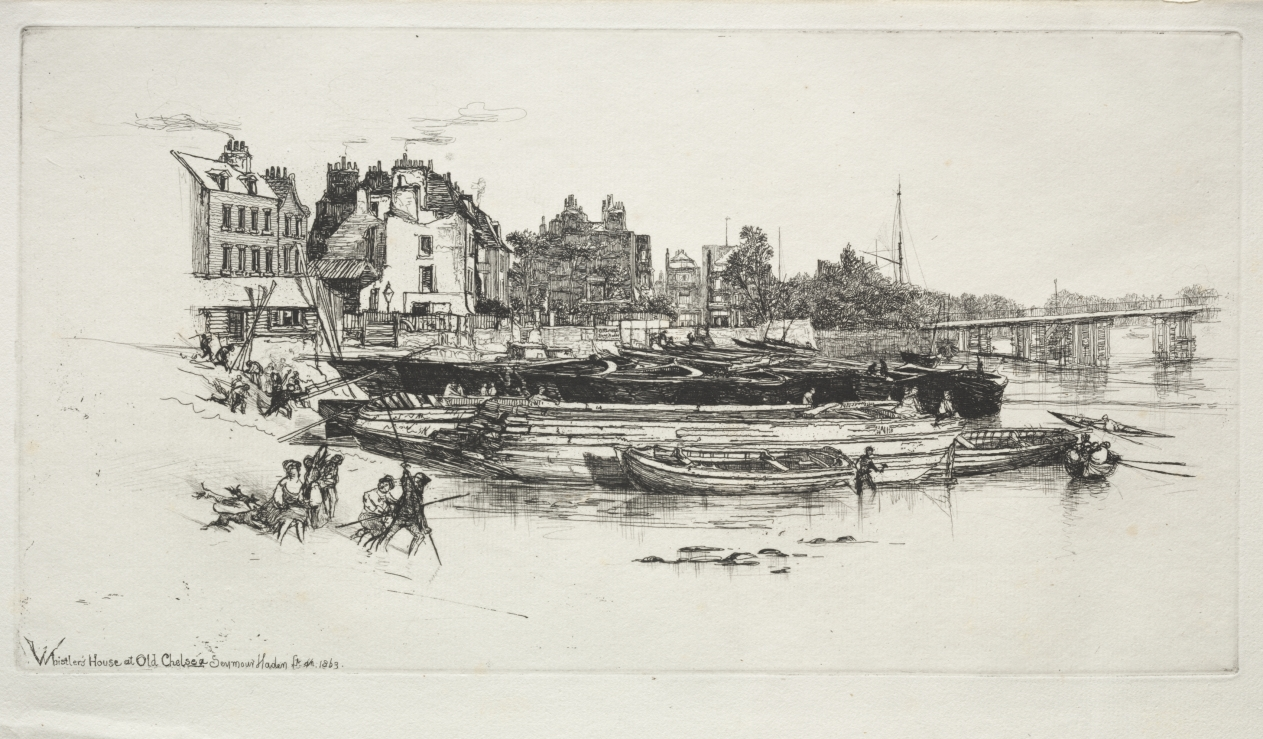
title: Whistler's House, Old Chelsea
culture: England, 19th century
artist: Francis Seymour Haden (British, 1818–1910)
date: 1863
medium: etching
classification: Print